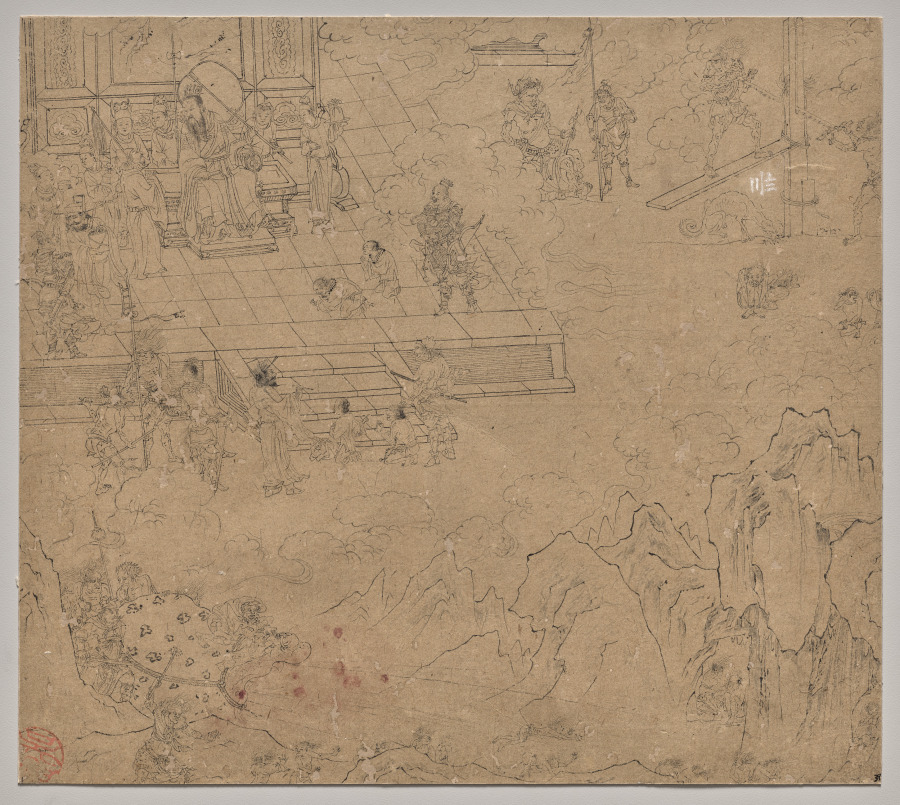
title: Album of Daoist and Buddhist Themes: Kings of Hells: Leaf 39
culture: China, Southern Song dynasty (1127-1279)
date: 1200s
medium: Album, ink on paper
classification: Painting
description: This extraordinary album has 50 paintings on a variety of religious subjects. They were likely created by several master craftsmen to share with studio apprentices as models for fulfilling commissions. The Jade Emperor and the Daoist pantheon make up the first 26 leaves. The next 14 leaves portray the Buddhist Ten Kings of Hell administering punishments to the dead. The third section, called “Clearing the Mountains,” features divine soldiers, led presumably by the deity Erlang Shen 二郎神, fighting undesirable creatures.